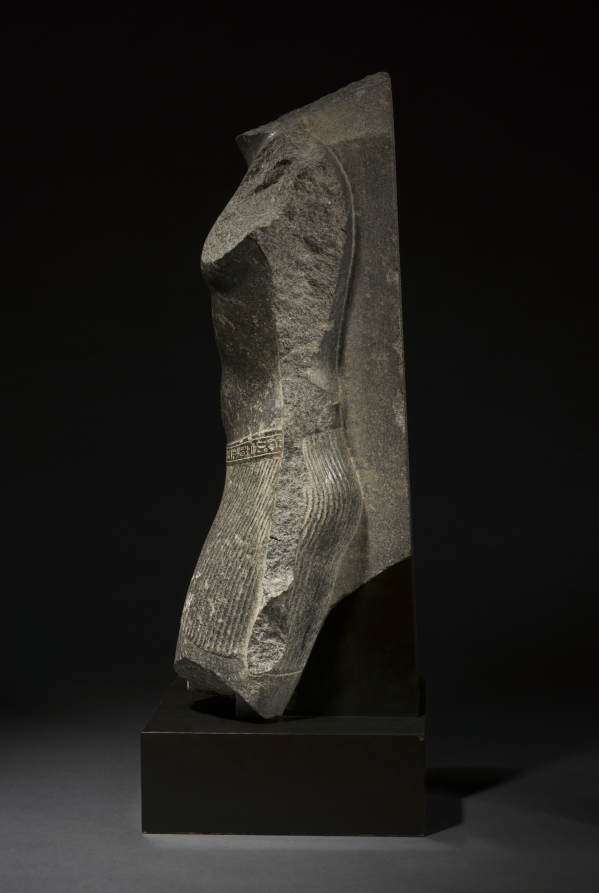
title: Torso of Amenpayom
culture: Egypt, Greco-Roman period (332 BCE–395 CE), Ptolemaic dynasty (305–30 BCE)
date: probably 200–100 BCE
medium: granodiorite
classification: Sculpture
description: This magnificent life-sized torso is inscribed for Amenpayom, the great army general of the district of Mendes in the Nile Delta. By the end of the Ptolemaic dynasty (305-30 BC) when this statue was made, the Egyptians could draw on 3,000 years of expertise carving hard stone. Enough remains to show that Amenpayom was represented in the traditional pose for men: left leg striding forward, arms at his sides, and supported by a back pillar. The subtle, masterful treatment of the undulating musculature and meticulous, flawless polish are hallmarks of this period, when Egyptian artists reveled in the natural beauty of the human form.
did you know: On the back Amenpayom is depicted again worshiping the gods of Mendes, Harpocrates, Banebjedet, and Hatmehit.